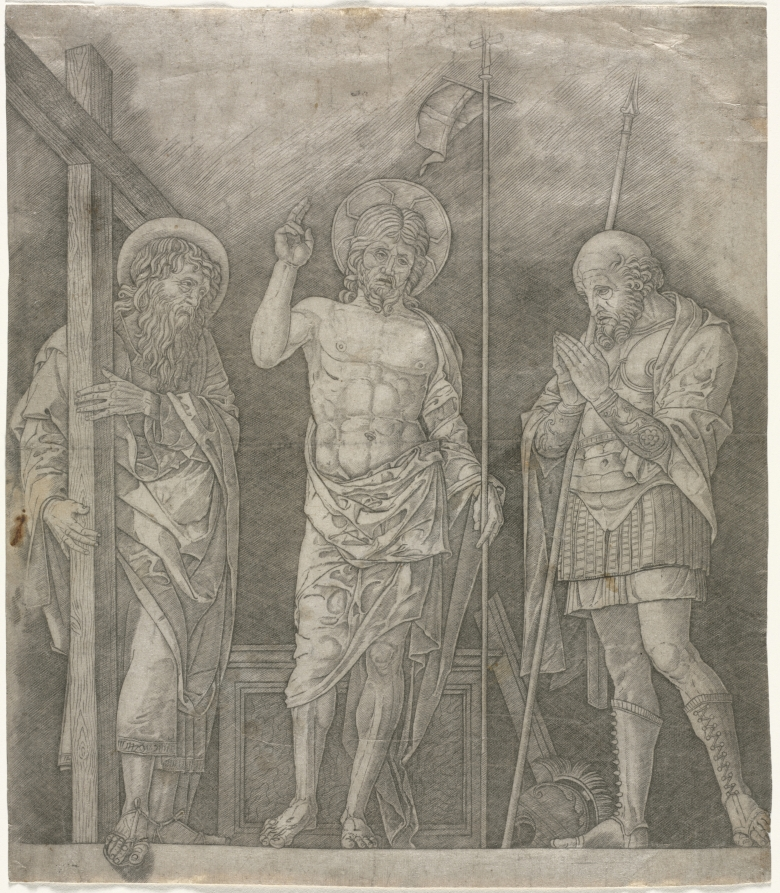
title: Risen Christ Between Saints Andrew and Longinus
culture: Italy, 15th century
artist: Giovanni Antonio da Brescia (Italian, about 1460–about 1520)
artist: after Andrea Mantegna (Italian, about 1431–1506)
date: c. 1500–1504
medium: engraving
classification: Print